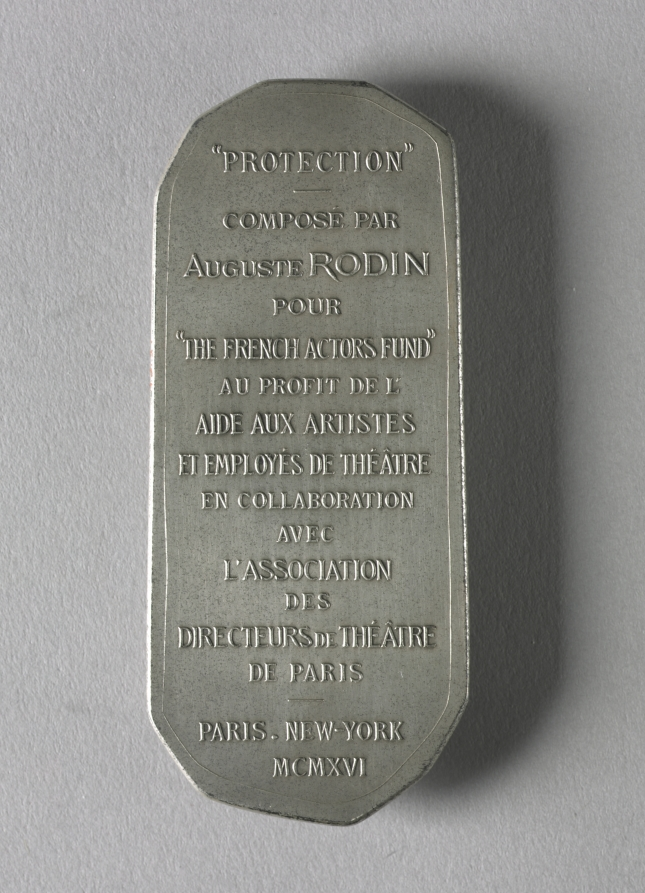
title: Medal: Protection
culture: France, early 20th Century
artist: Auguste Rodin (French, 1840–1917)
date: 1916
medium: silver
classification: Metalwork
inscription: inscribed at bottom: "Rodin"; stamped on frame: "Argent." Inscribed on back: "Protection/compose par/Auguste Rodin/pour "The French Actors Fund"/au profit de l'aide aux artisted/et employes de theatre/en collaboration/avec/L'Association/des directeurs de theatre/de Paris/ Paris. New York/MCMXVI."